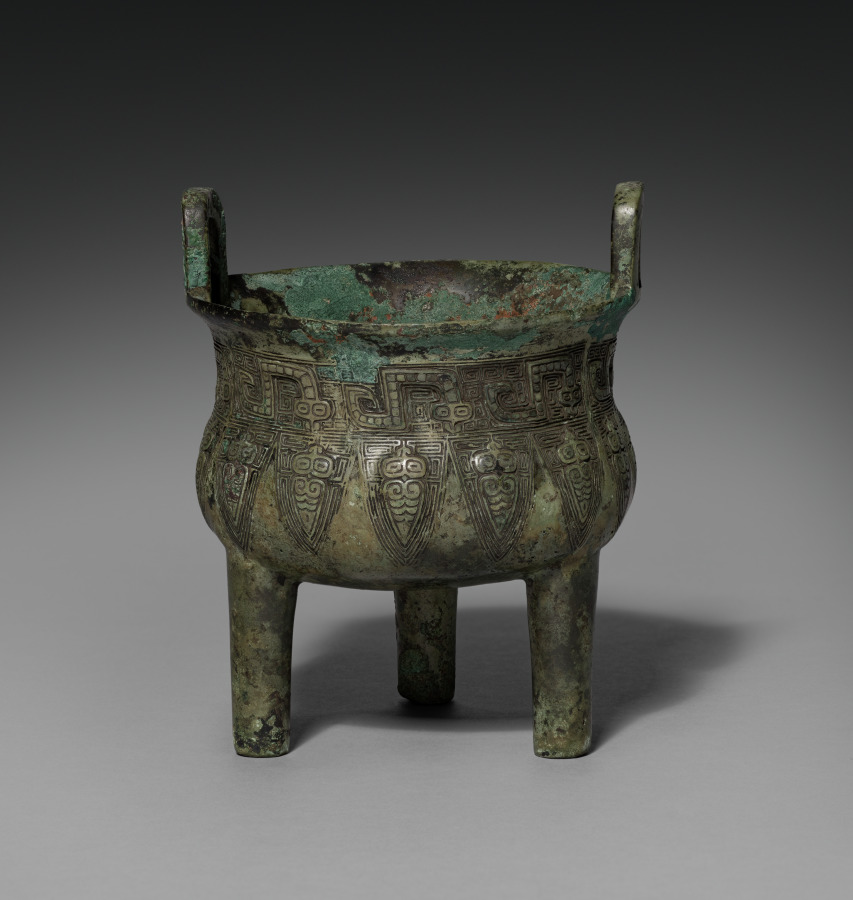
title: Tripod Cauldron (Ding)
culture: China, Shang dynasty (c. 1600–c. 1046 BCE)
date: 1200–1100 BCE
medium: bronze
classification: Metalwork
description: In ancient China, bronze tripods of the type called ding were made in sets of different sizes to be used in rituals in which grain and meat was offered to the spirits of the ancestors. These bronzes were subsequently both collected items and major scholarly preoccupations in Chinese history. They were prized art treasures that provide source materials for Chinese historiography and antiquity studies. Catalogues of archaic bronzes have been published since the Song dynasty. Scholars studied the bronze inscriptions, typologies, and terminologies, and these studies exerted an impact in the field well before the birth of modern art history and archaeology.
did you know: The vessel shows a band of silkworms and cicadas in two registers.